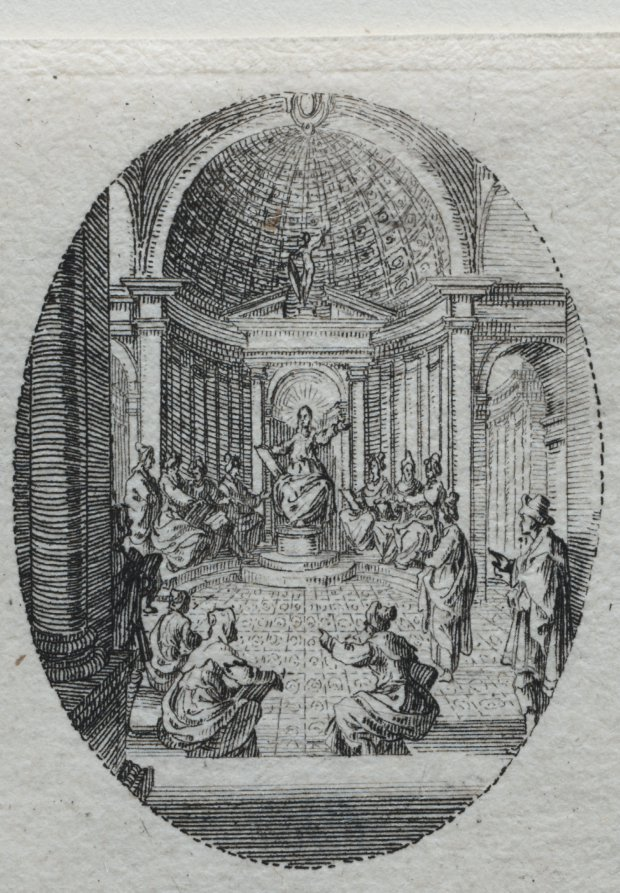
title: The Mysteries of the Passion: Christ Disputing with the Doctors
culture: France, 17th century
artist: Jacques Callot (French, 1592–1635)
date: 1631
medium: etching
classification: Print